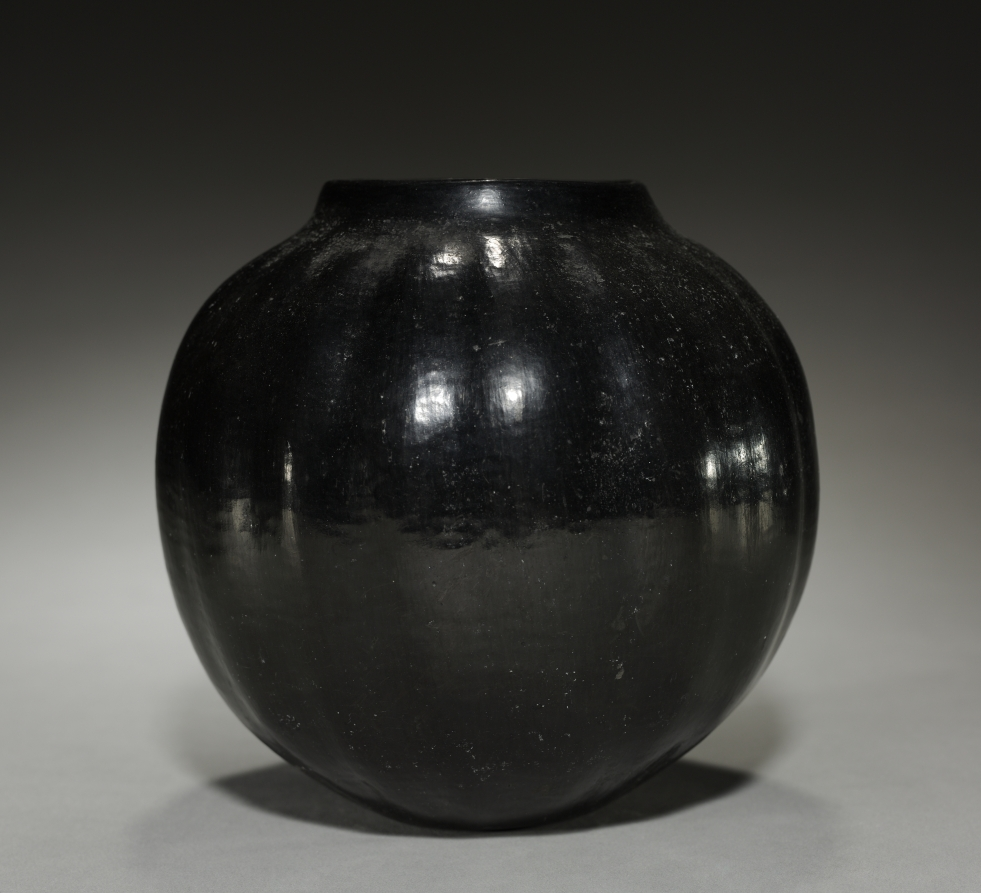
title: Pumpkin-shaped Jar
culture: Southwest, Santa Clara Pueblo, 20th century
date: c. 1900– 1925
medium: black ware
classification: Ceramic